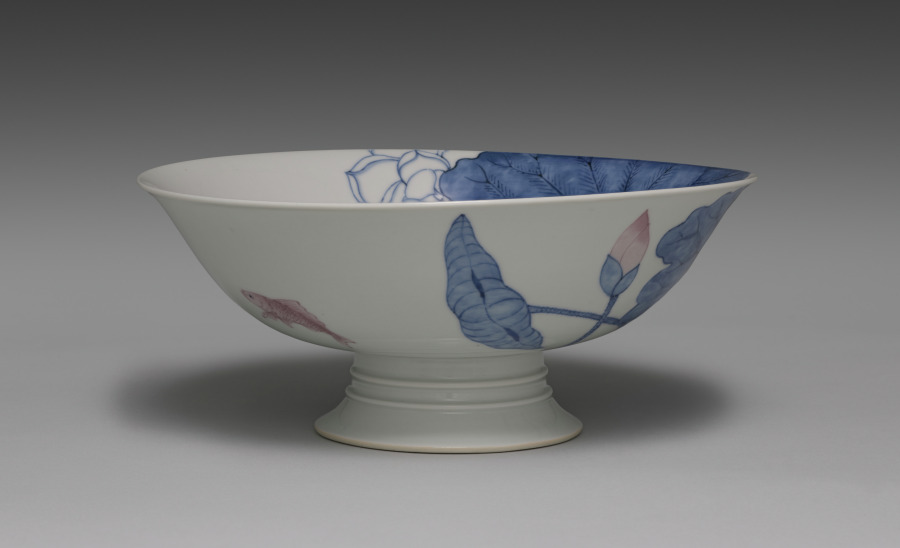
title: High-Footed Bowl with Lotus Pond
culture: Japan, Meiji period (1868–1912)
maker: Seifū Yohei III (Japanese, 1851–1914)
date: 1887–92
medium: Porcelain with underglaze color and modeled designs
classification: Ceramic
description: Seifū Yohei III was the most prominent head of a ceramics studio in Kyoto that specialized in Chinese-style porcelains and especially items for use in sencha (煎茶), or the drinking of steeped-leaf tea with companions. Sencha was popular among the bunjin of Kyoto and Osaka, who often enjoyed it as part of their emulation of Chinese culture. While sencha was by design less formal than the Japanese tea ceremony, it still featured the display of treasured objects. Prized Chinese antiquities were generally unobtainable, so substitutes such as the Gu-Shaped Flower Vase, CMA 2022.224, were much in demand. Bowls for distributing sweets, like this one, were also a staple of sencha gatherings.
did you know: This high-footed bowl simulates exploration of a pond both from underwater and from the sky.